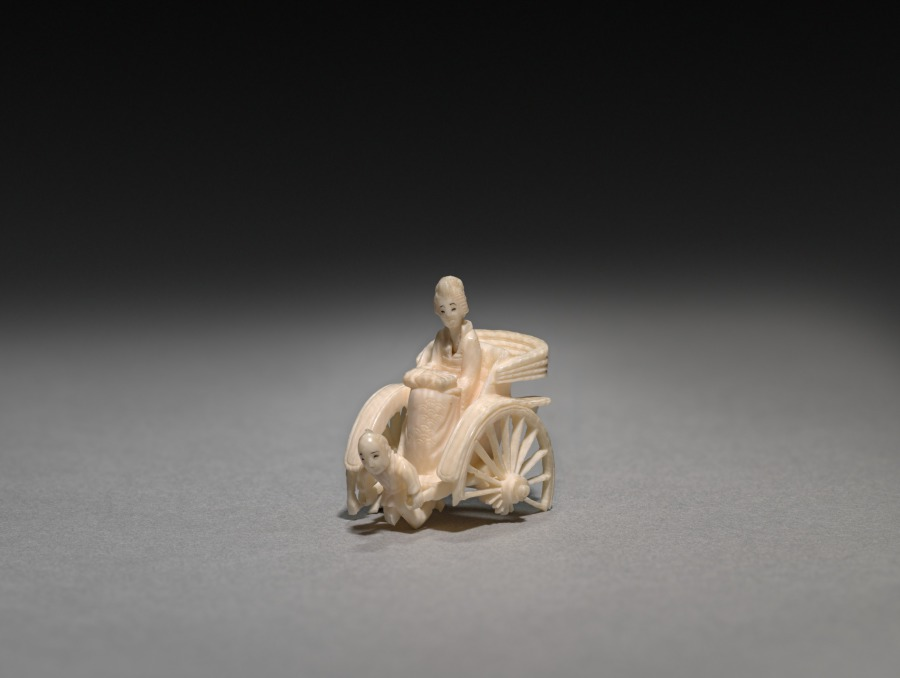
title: Woman in a Jinrikisha (Rickshaw)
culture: Japan, Meiji period (1868–1912)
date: early 1900s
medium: ivory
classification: Ivory